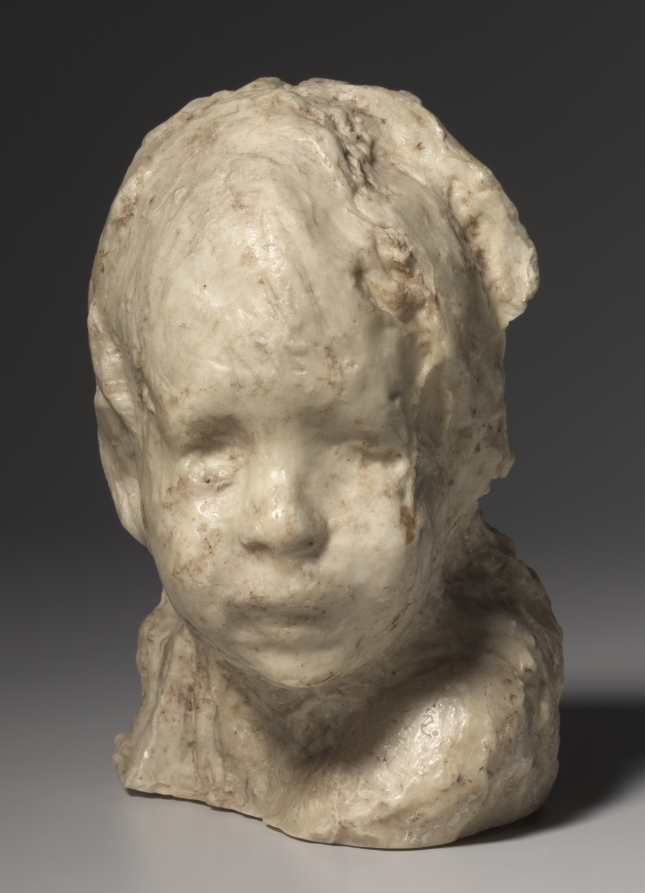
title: The Jewish Boy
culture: Italy, 19th century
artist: Medardo Rosso (Italian, 1859–1928)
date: c. 1892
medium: wax on plaster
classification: Sculpture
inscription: inscribed on left shoulder: "Bolgé/(M.?) Rosso."; inscribed inside: Danila Rosso Parravicini.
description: Medardo Rosso was a highly experimental sculptor who deliberately cultivated coarse, unrefined surfaces in his work. In this head of a boy—which the artist considered one of his most successful works—he effectively utilized the fluid properties of wax to suggest the fleeting movement of a child’s expression as well as the ephemeral nature of childhood.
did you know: Like the Impressionist painters of his time, Rosso sought to capture the fleeting and ephemeral qualities of light. However, he did not work directly from nature. His images were created from memory and emotion.